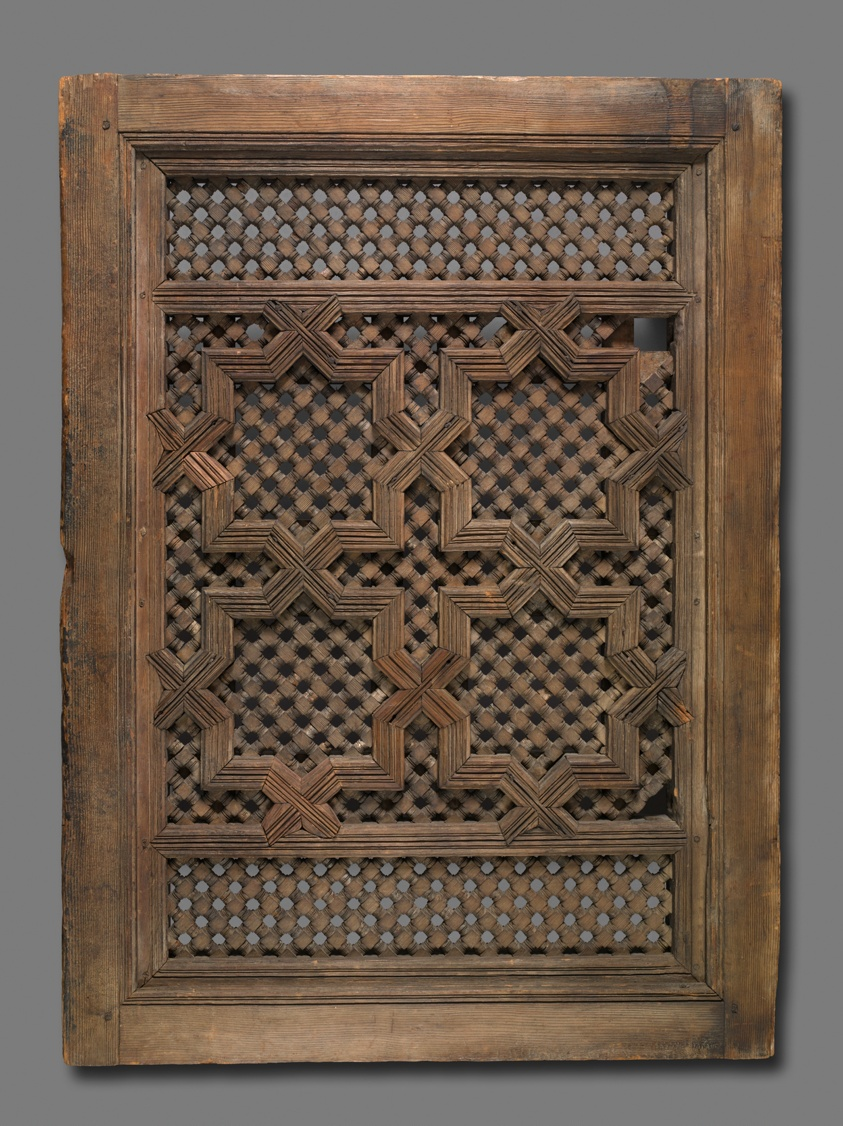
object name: Architectural fragment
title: Window Screen (Mashrabiya)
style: Islamic (culture or style)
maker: Morocco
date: 17th/18th century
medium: Carved wood with iron bolts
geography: Morocco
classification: window screen; wood; architectural fragment; asian art